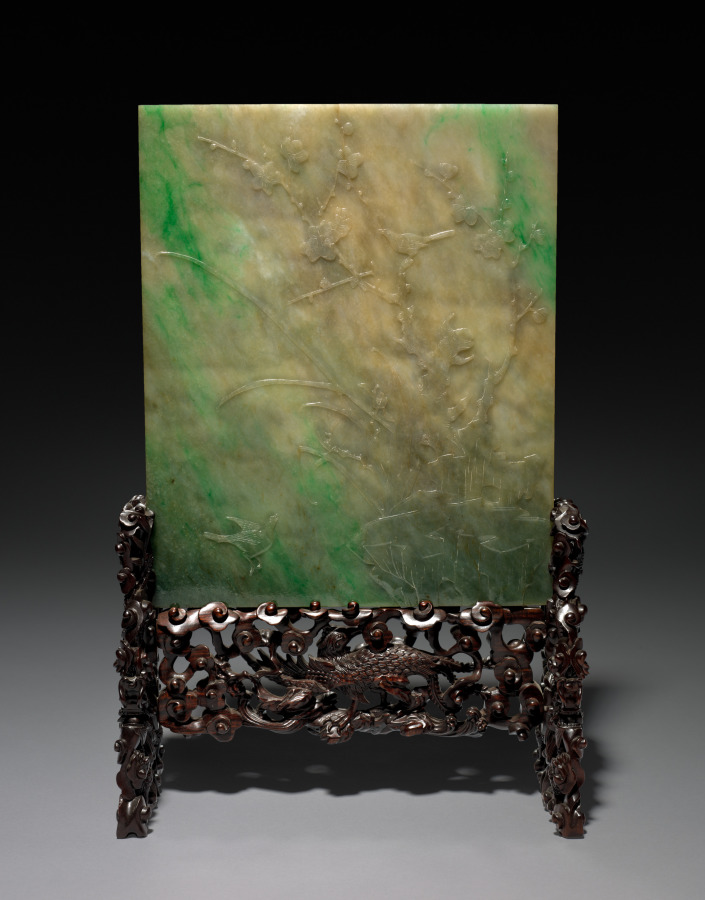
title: Table Screen with Stand (stand)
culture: China, Qing dynasty (1644-1911)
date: 1644–1911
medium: carved wood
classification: Wood